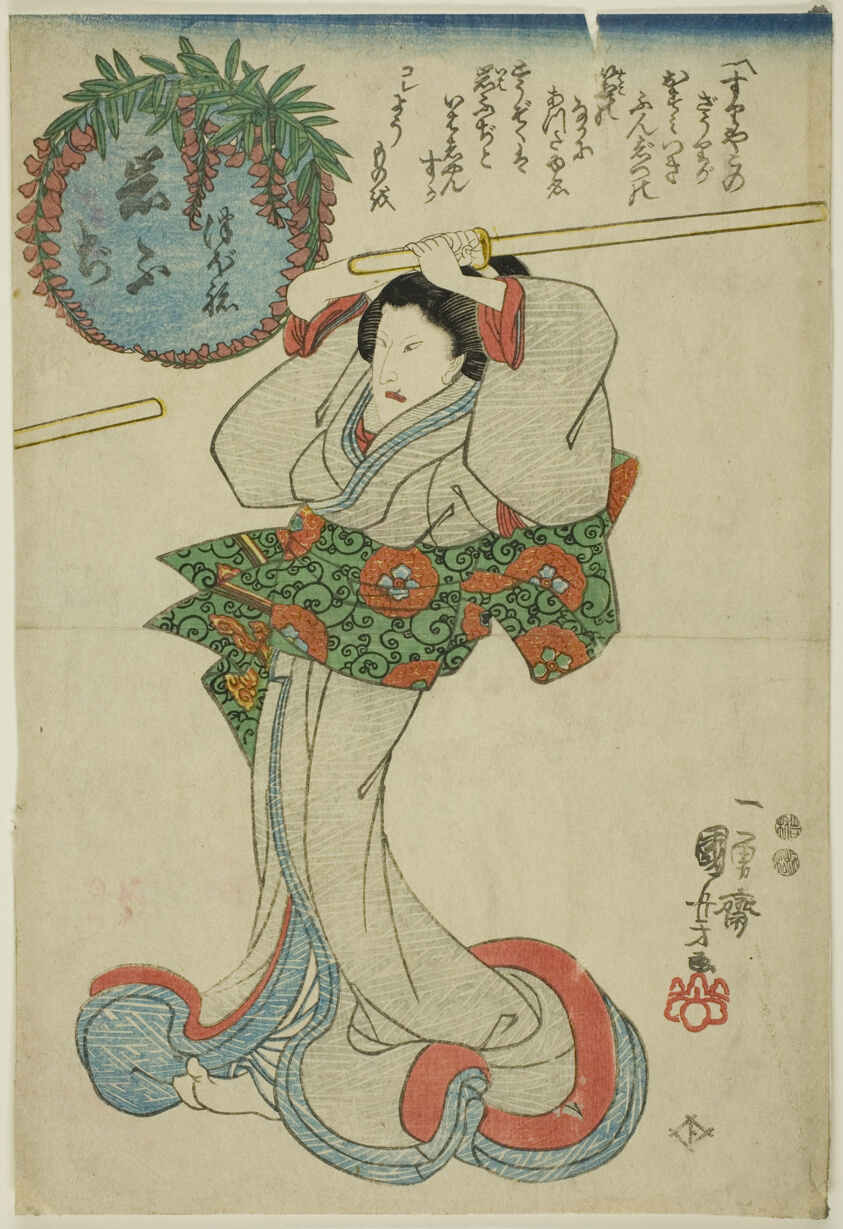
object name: Print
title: Iwafuji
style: Japanese (culture or style)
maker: Utagawa Kuniyoshi (Japanese, 1797-1861)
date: c. 1847/48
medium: Color woodblock print; right sheet of oban triptych (center: 1901.115)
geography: Japan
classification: woodblock print; print; asian art